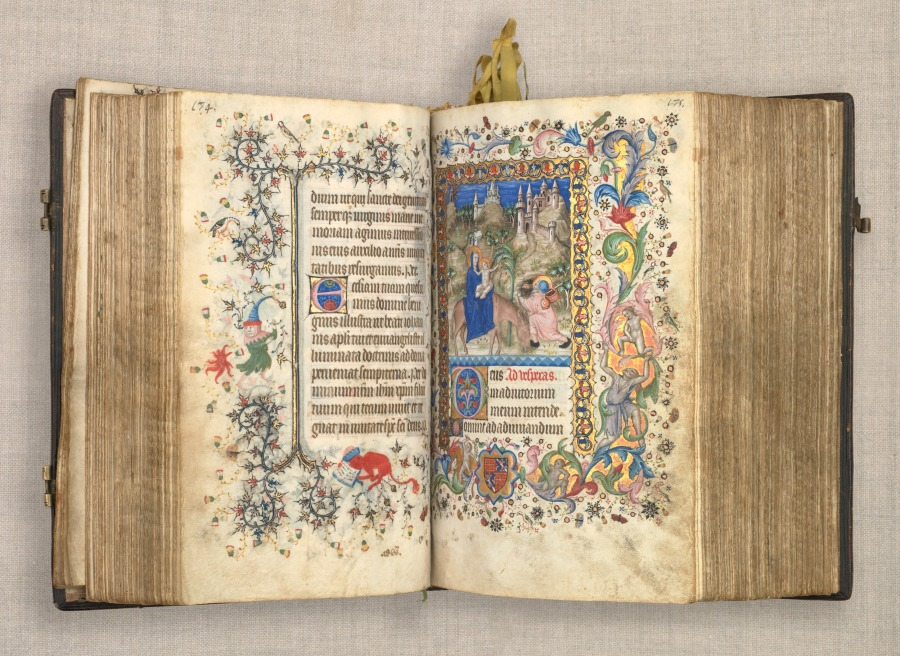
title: Hours of Charles the Noble, King of Navarre (1361-1425): fol. 88r, Flight into Egypt (Vespers)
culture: France, Paris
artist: Master of the Brussels Initials and Associates (French)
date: c. 1405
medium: ink, tempera, and gold on vellum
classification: Bound Volume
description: This precious volume was obviously highly prized by its owner, the French-born King of Navarre, who had his coat of arms painted on no less than twenty folios. Rather than directly commissioning this manuscript from a specific workshop, it seems that Charles the Noble acquired his book of hours -- perhaps ready-made for the luxury market -- while on a trip to Paris in 1404-05. A collaborative effort, six painting styles are evidenced within the pages of this codex, those of two Italians, two Frenchmen, and two Netherlanders. The painter who was responsible for the planning and decoration of the book, and who produced seventeen of the large miniatures, was a Bolognese artist known as the Master of the Brussels Initials. His principal assistant, responsible for most of the borders, was a Florentine who signed his name "Zecho" da Firenze on folio 208 verso.